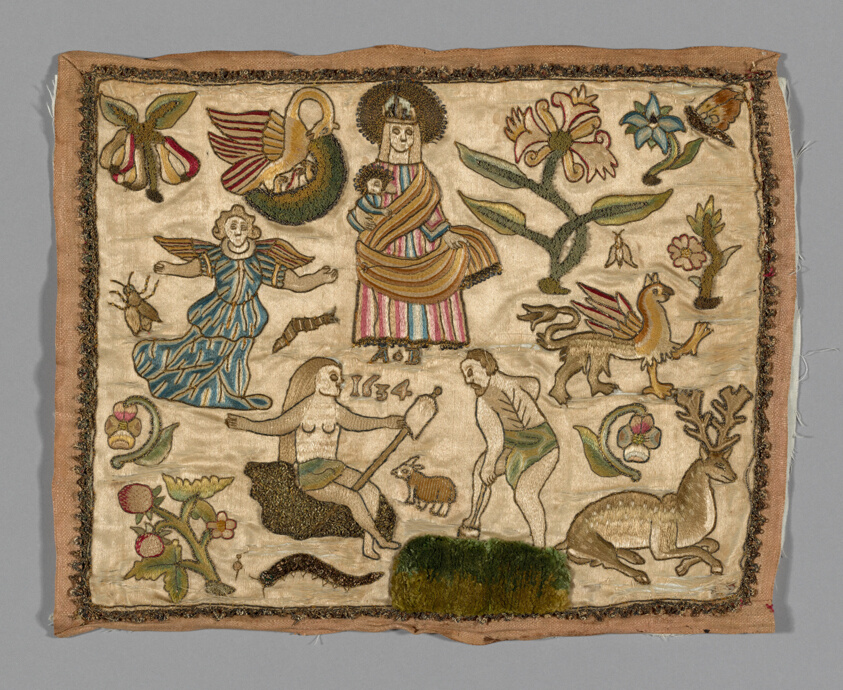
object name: Textile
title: Picture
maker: England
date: 1634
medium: Silk, satin weave; embroidered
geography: England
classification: textile; needlework (visual works)